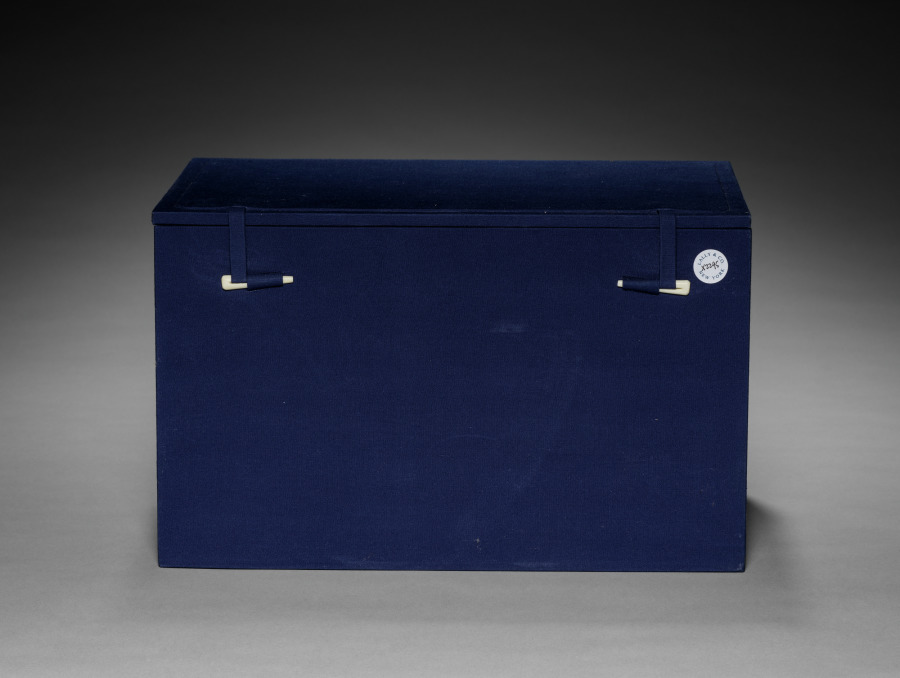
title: Meiping Vase with carved Dragon Motif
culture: South China, Yuan dynasty (1279–1368)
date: 1300s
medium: Porcelain with pale bluish-white (qingbai; 青白) glaze and carved decoration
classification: Ceramic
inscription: There are multiple self-adhesive labels on the bottom: 1. Square white (now yellowed with age) label with "90" written in red ink. 2. White rectangular label with "L.80.17.8" written in pencil. 3. Fabric tape cut to rectangular shape with "L.2161.49 /39" written in black ink. 4. White round label from Lally & Co. New York with "X2295" written in black ink.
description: A fierce coiling dragon chasing a pearl amid mist and clouds—a symbol of fertility and power—decorates this sturdy vase. Its shoulder is incised with a band of lotus flowers and the base features a border of lotus petals. Meiping, literally prunus vase, derives its name from being used to display a single floral spray, traditionally a branch of blossoming plum (or prunus), apricot, or cherry.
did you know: In Chinese mythology, the dragon is believed to transport human souls to the heavens after death.